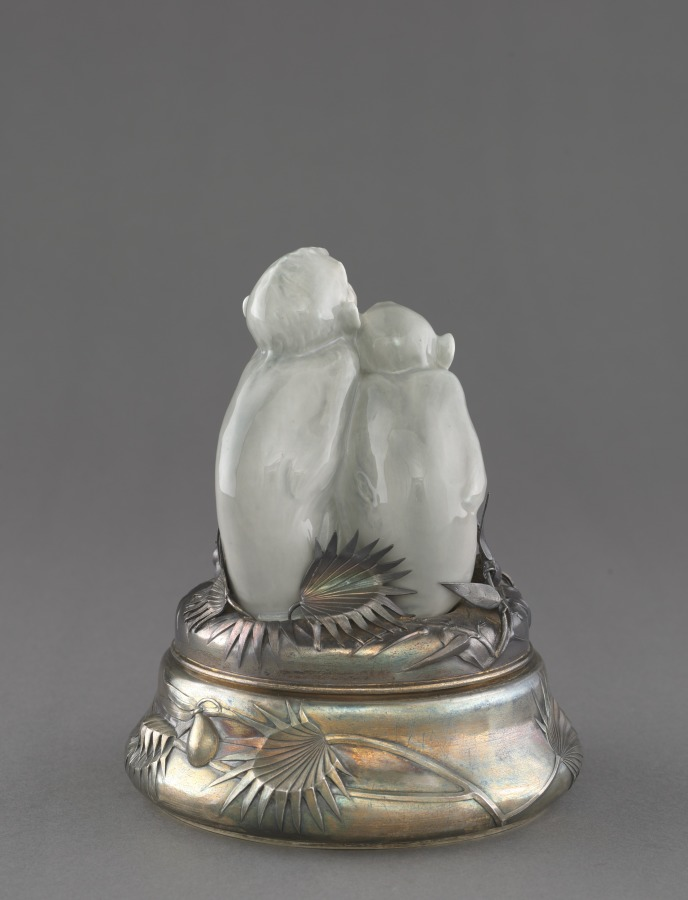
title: Monkey Figure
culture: Denmark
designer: Ingeborg Plockross-Iminger (Danish, 1872–1962)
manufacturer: Bing & Grøndahl (Danish, est. 1853)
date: c. 1900–1925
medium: porcelain, silver-gilt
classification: Sculpture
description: This figure featuring three monkeys was designed by the Danish ceramist Ingeborg Plockross-Iminger. The figure is displayed with a French silver mount that references Japonisme and Art Nouveau styles that were popular at the end of the 1800s and experienced a resurgence in the 1920s because of increased importation of Japanese goods to the West.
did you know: This ceramic figure usually stands alone, without a silver mounting.